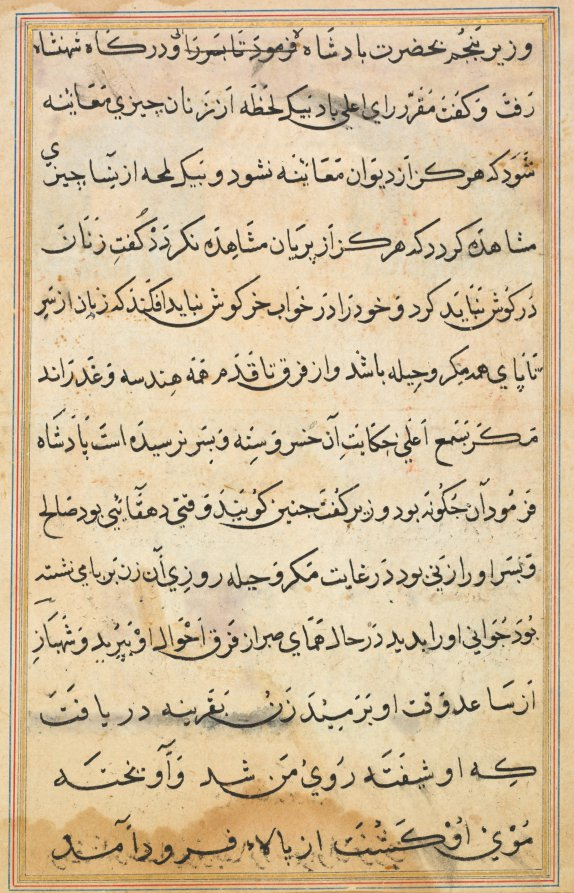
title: Page from Tales of a Parrot (Tuti-nama): text page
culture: Mughal India, court of Akbar (reigned 1556–1605)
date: c. 1560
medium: gum tempera, ink, and gold on paper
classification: Painting